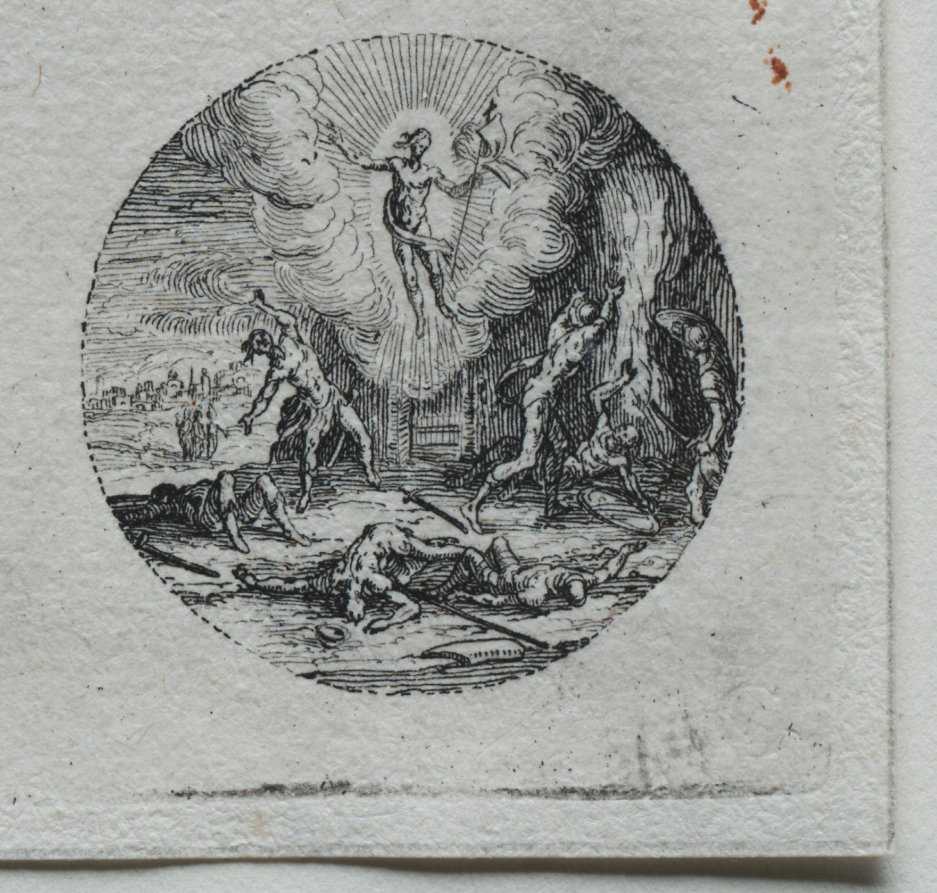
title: The Mysteries of the Passion: The Transfiguration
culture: France, 17th century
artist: Jacques Callot (French, 1592–1635)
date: 1631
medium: etching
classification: Print